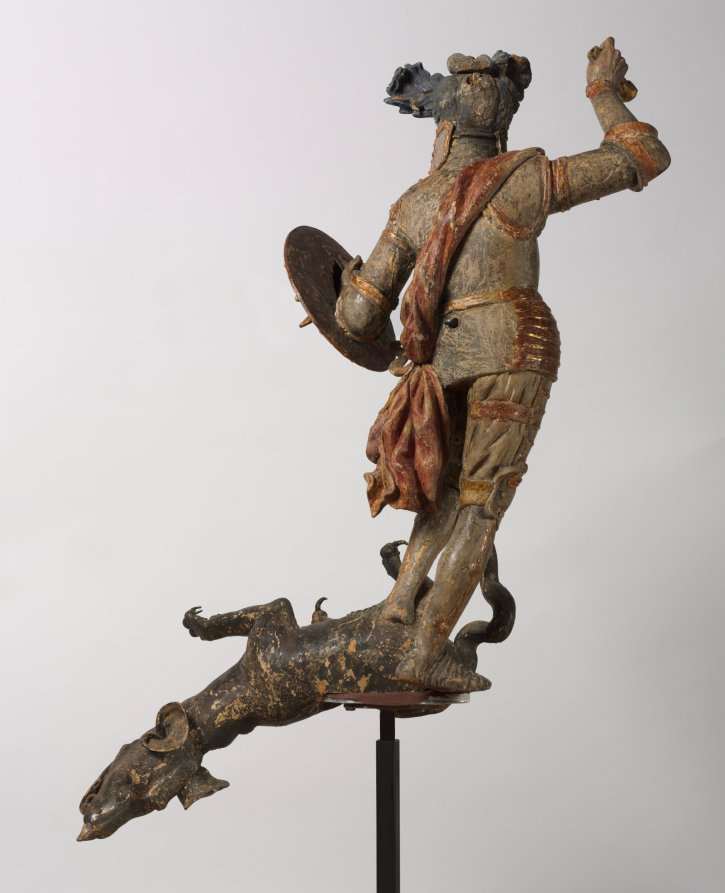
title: Saint George and the Dragon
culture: South Germany or Austria, late 17th century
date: late 1600s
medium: painted and gilded wood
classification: Sculpture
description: Saint George, a Roman soldier martyred for his Christian faith, is best known for slaying a fearsome dragon that terrorized the city of Silene, in Libya. George offered to kill the monster if residents of the city convert to Christianity. Here, George stands triumphantly over the dragon, writhing as it dies. The artist deliberately incorporated features intended to make his figure seem more familiar: the dragon seems more canine than reptilian, while George wears armor from the recent past and bears almost portrait-like facial features.